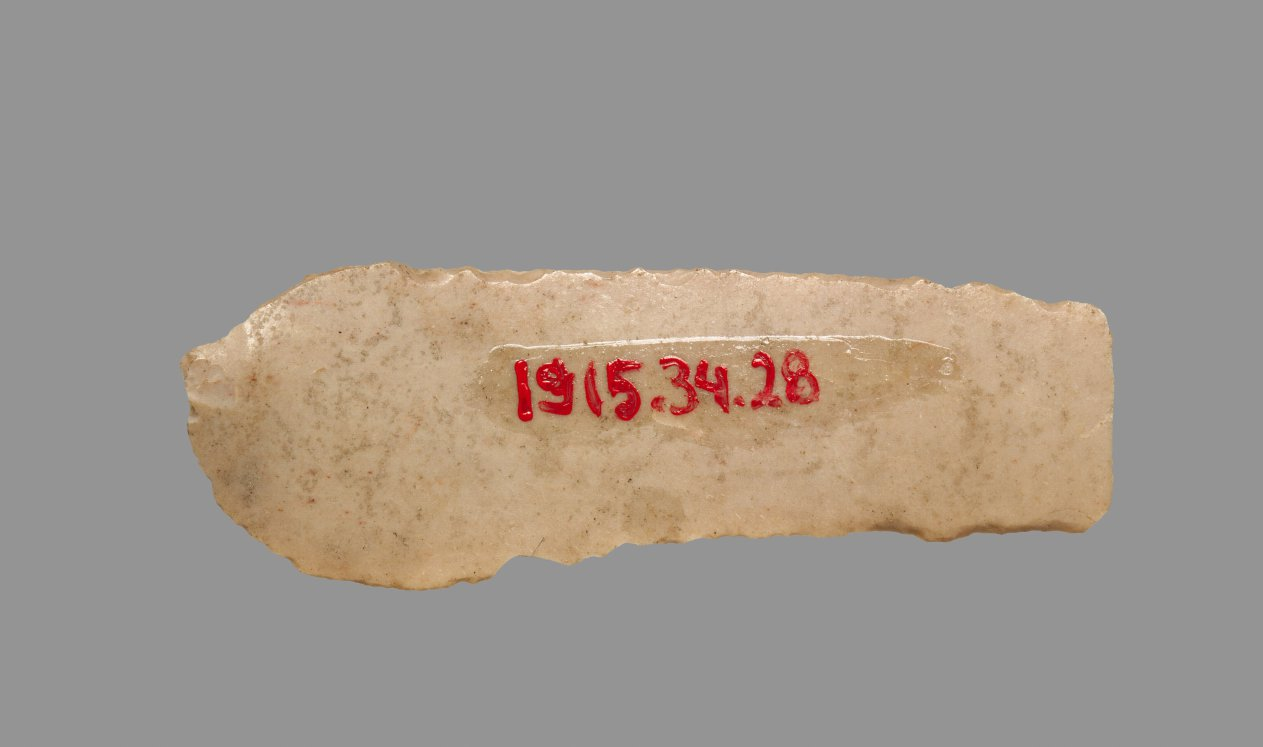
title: Sickle Blade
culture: Egypt, Middle Kingdom (2040–1648 BCE), Dynasty 12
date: 1980–1801 BCE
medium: flint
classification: Implements